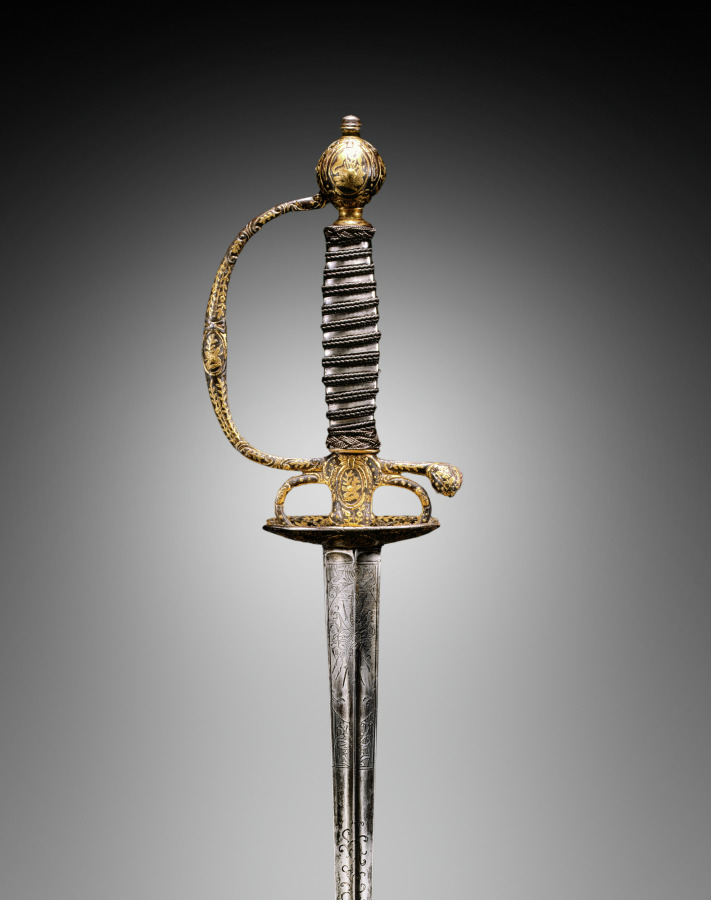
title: Smallsword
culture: France, Paris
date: c. 1730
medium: steel, blued, with gold encrusted decoration; chased and engraved; silver wire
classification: Arms and Armor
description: During the 1700s, the small-sword emerged as a light, quick weapon. Like the rapier it was carried by unarmored civilians, the noblemen of the upper classes. Over time this delicate sword became more an accessory of male attire than a weapon essential to life and death. The sword hilt, which shows even when the blade is sheathed, became the ground for elaborate decoration. These small swords thus represent the final stage in the evolution of the sword, from the edged weapons of antiquity to the elegantly refined blades of the 1700s and 1800s.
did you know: The decorative design of the hilt was often carried down onto the blade, which could be chased or etched with designs, and gilded or blued as seen here.